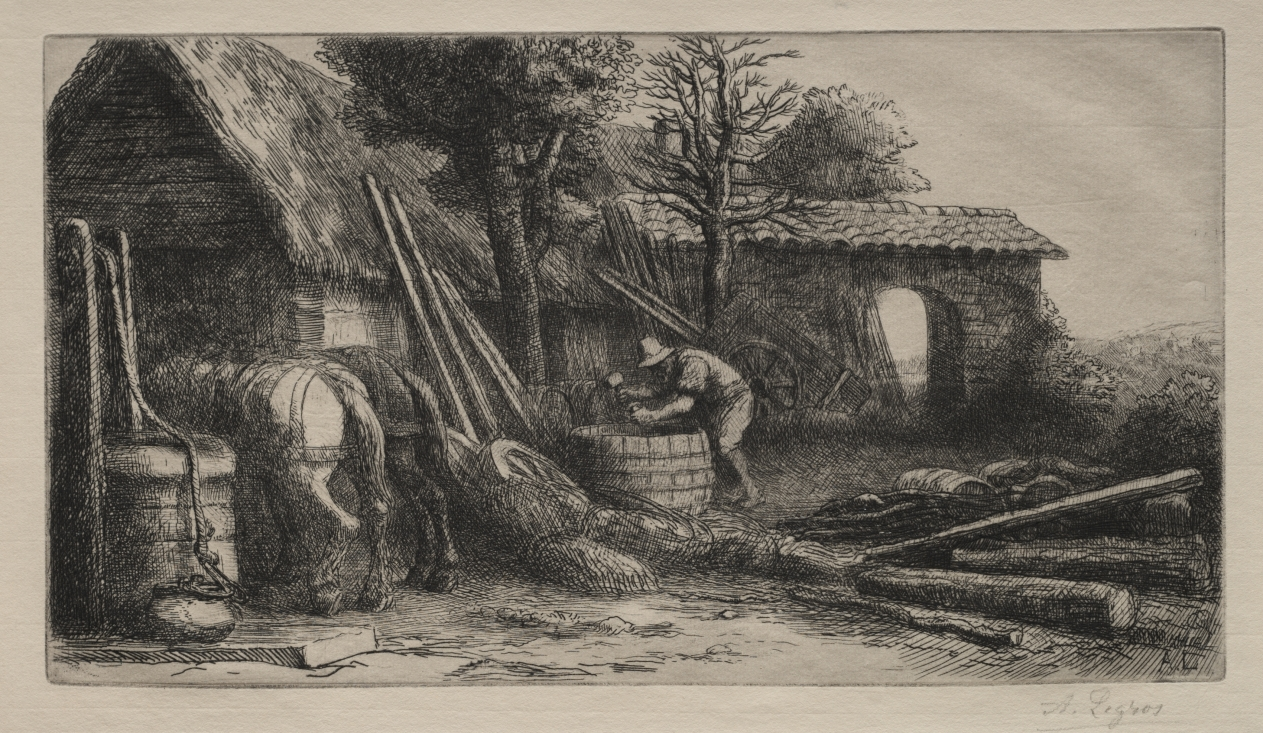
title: Le Tonnelier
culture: France, 19th-20th century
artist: Alphonse Legros (French, 1837–1911)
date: c. 1857–1911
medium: etching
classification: Print